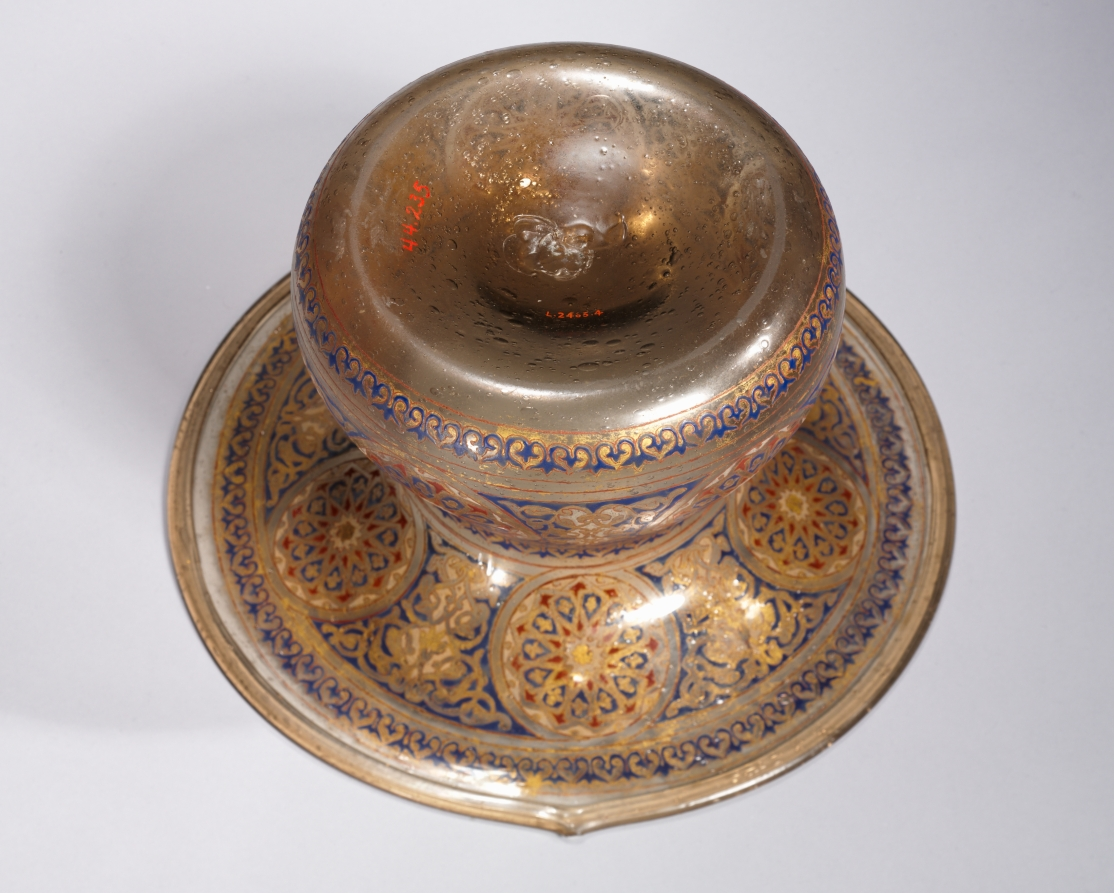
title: Ceremonial Spittoon or Basin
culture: Europe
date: late 1800s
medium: glass with enameled and gilded decoration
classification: Glass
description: This basin, as with the mosque lamp CMA 1981.10, is representative of reproductions of Mamluk glass that were prominent in the late 1800s in Europe during a period of resurgence of interest in Islamic art. At this time, collectors and artists revived the techniques of enameling and gilding that are hallmarks of Mamluk glass.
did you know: The intense enamel colors form striking star and leaf patterns.